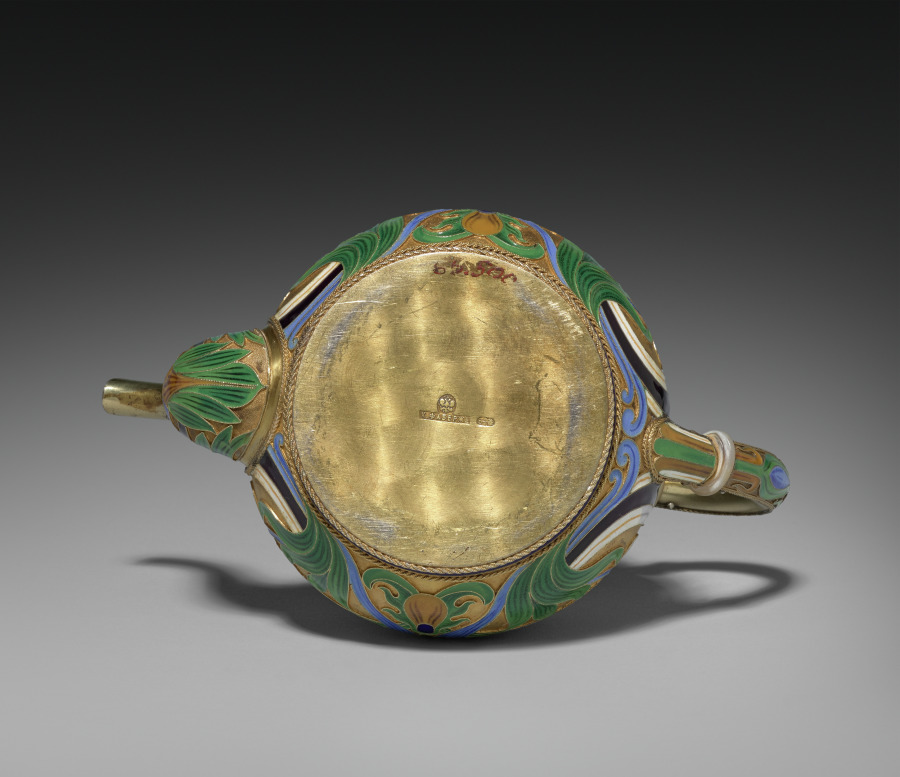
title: Covered Teapot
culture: Russia, St. Petersburg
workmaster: attributed to Feodor Ivanovich Rückert (Russian, 1840–1917)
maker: House of Fabergé (Russian, 1842–1918)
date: 1887–96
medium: silver gilt, opaque cloisonné enamel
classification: Miscellaneous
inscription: 84, St. George [assay mark for Moscow, 1882-1896]; C. Fabergé (in Cyrillic); double-headed eagle [imperial warrant]; St. George; initials of Carl Fabergé (in Cyrillic).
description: Fabergé’s craftsmen in Moscow, especially under the watchful eye of workmaster Feodor Rückert, became known for their work in the pan-Slavic or neo-Russian style, hearkening back to 17th-century motifs of Russian folk art. Often on rather conventional shapes, Rückert and his silversmiths created an explosion of color, achieved through the historic technique of cloisonné enamel in which tiny metal lines are soldered to the surface then filled with glass powders in various colors and fired to create a high gloss finish. The result is a spectacular evocation of the 17th-century originals. Far from mere copies, however, Rückert's designs, such as this tea service, employ naturalistic or abstract motifs in a thoroughly modern adaptation of a remarkable earlier period of Russian art and decoration.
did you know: This covered teapot is part of a larger tea service.